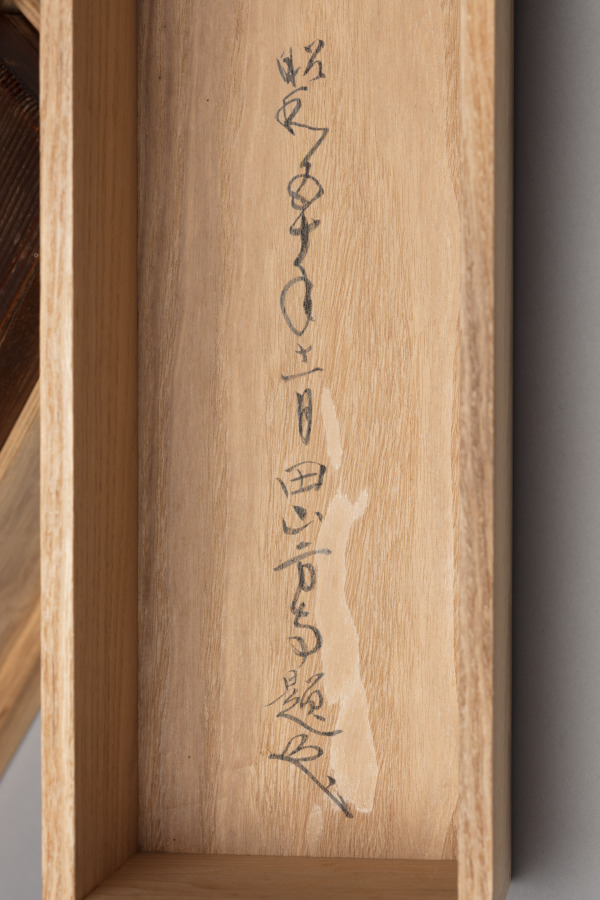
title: Calligraphy with Willow and Swallows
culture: Japan, Muromachi period (1392–1573)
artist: Ikkyū Sōjun (Japanese, 1394–1481)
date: 1400s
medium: hanging scroll, ink on paper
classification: Painting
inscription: How many days has it rid itself of the crow’s cloth? It knows not!/ Lovely is its body so nimble and neat./ Neither men of wealth, courtly position, or power can come close to the unfettered, noble swallow!/ With the coming of spring, it seems to be flying about, dancing around the grass hut of the foolish Priest. signed: Unkasō Isshi Tōkai jun Ikkyū shi ga ippitsu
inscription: outer box inscribed: Ikkyū Ōshō Enshi-zu Jigasan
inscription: inner box side lid inscribed: Showa 50 (1975), November by Tayama Honan with kao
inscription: Inner box side lid inscribed: Ikkyū Ōshō Bokuseki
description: The famed Buddhist monk Ikkyū is best remembered for his calligraphy. Calligraphic conventions of his time called for brushwork that did not vary much in style from character to character. However, as Ikkyū’s lines progress, his brushwork wanders between standard script and a sort of shorthand, marked by an uneven distribution of ink and a reduction of the characters to only the most necessary strokes. Ikkyū’s direct communication of emotion via brushwork became characteristic of the works produced by monks affiliated with the temple Daitokuji later in the Edo period (1615–1868).